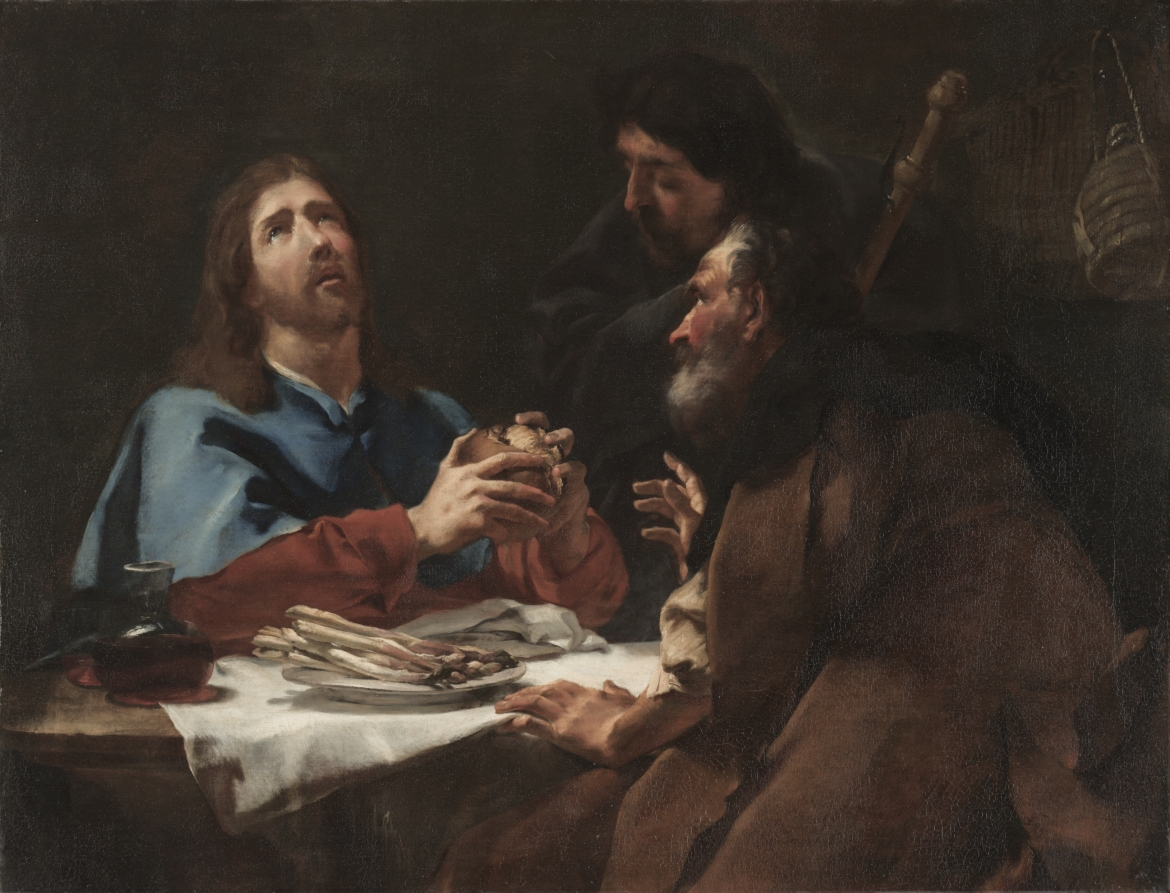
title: The Supper at Emmaus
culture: Italy, 18th century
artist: Giovanni Battista Piazzetta (Italian, 1682–1754)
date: c. 1720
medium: oil on canvas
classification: Painting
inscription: Signed lower left: "Piaceta f."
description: This painting depicts the biblical story of the Supper at Emmaus, when the disguised, resurrected Christ suddenly reveals himself to two astonished disciples as they all sit down to dinner. The artist has painted the figures’ hands and the objects on the table meticulously, but leaves other details vague, including the background drapery, in order to heighten the unfolding drama.